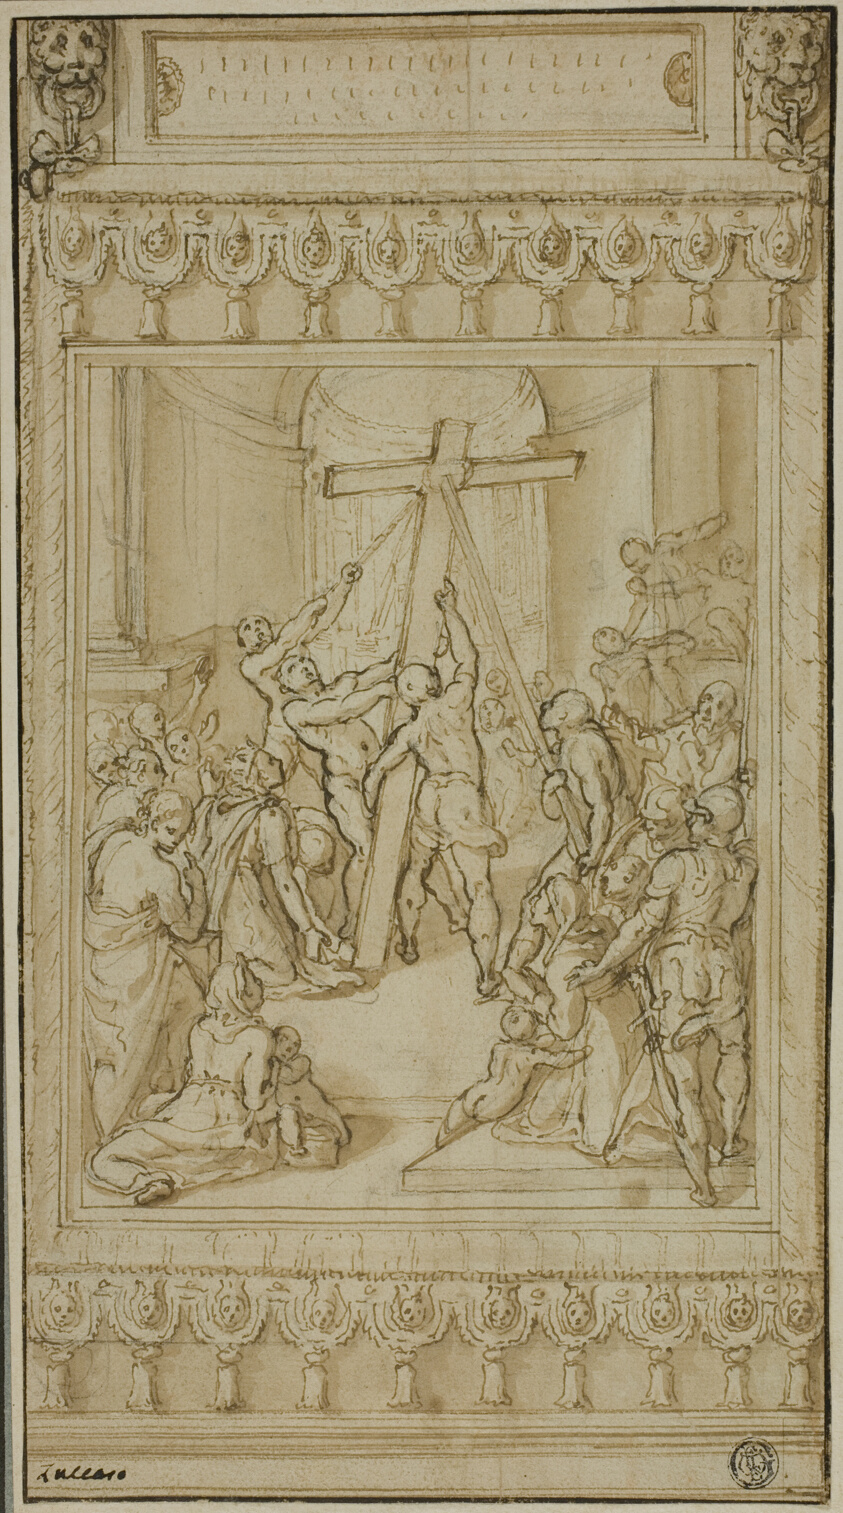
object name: Drawing and Watercolor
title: Saint Helena Kneeling before the True Cross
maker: Cesare Nebbia (Italian, 1536-1614)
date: c. 1582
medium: Pen and brown ink with brush and brown wash, over black chalk, on cream laid paper, edge mounted on cream wove paper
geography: Italy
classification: ink with wash; drawings (visual works); prints and drawing